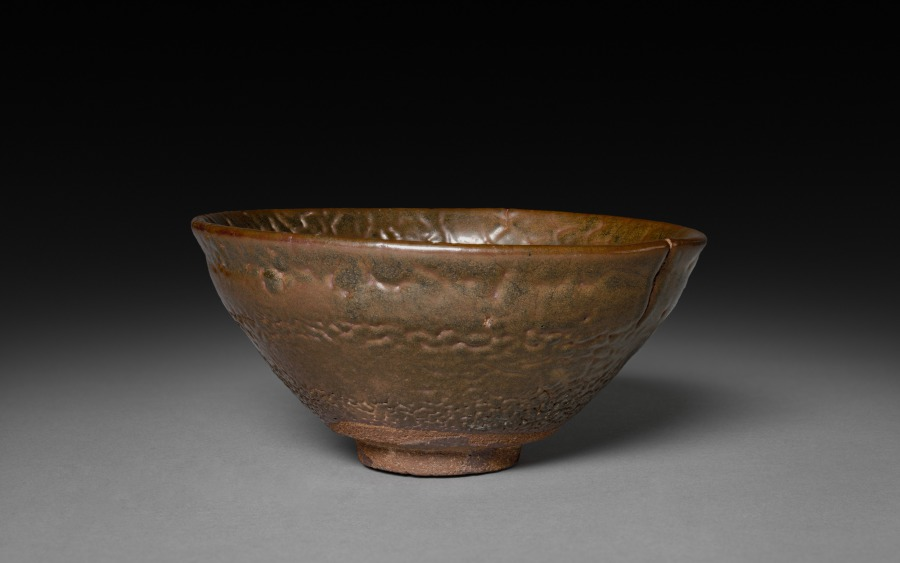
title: Tea Bowl: Jian ware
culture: China, near Shui ch'i, Song dynasty (960-1279)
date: 960–1279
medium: stoneware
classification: Ceramic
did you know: Jian ware was very popular with the tea cultures in China and Japan.